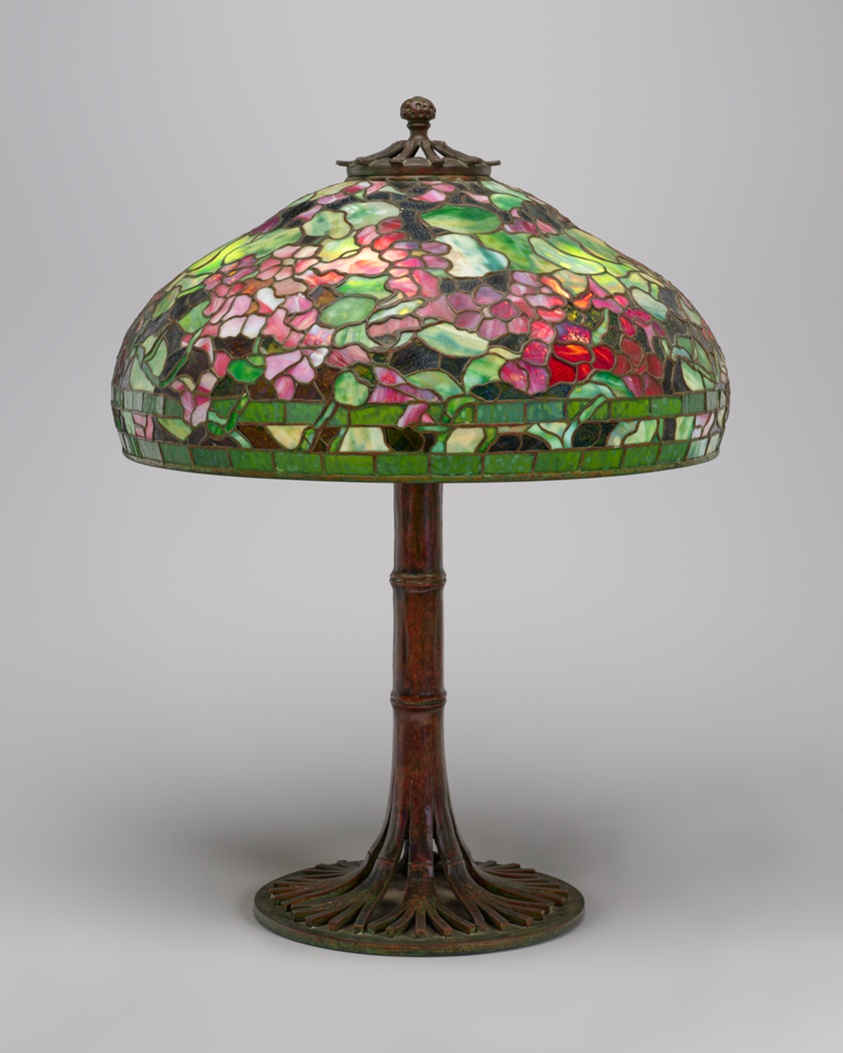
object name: Furnishings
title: Lamp with “Nasturtium” Shade and “Bamboo” Base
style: Arts and Crafts Movement, 20th Century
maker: Design attributed to Clara Pierce Wolcott Driscoll (American, 1861–1944); Tiffany Studios (American, 1902–32); Corona, New York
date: c. 1910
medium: Favrile glass and bronze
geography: Corona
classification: lamp (lighting device); american decorative arts; decorative arts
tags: Nasturtium, bamboo